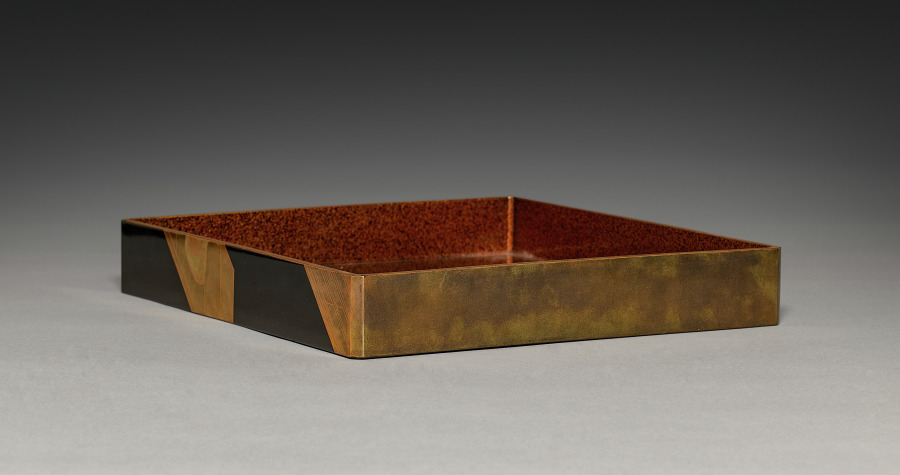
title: Writing Box with Spitting Courtesan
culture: Japan, Edo period (1615–1868)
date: early to mid-1800s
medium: Lacquered wood with maki-e (image made of sprinkled gold dust)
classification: Lacquer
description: The design on this writing box shows a courtesan who has just completed an impressive feat of spitting the term shinobukoi (忍恋), which could be translated as “hidden love” or “unrequited love,” on an earthen wall. The phrase appeared in classical Japanese poetry anthologies produced by nobles writing in ink on the finest decorated papers. Here, the confining walls of the brothel district become a space for public announcement in graffiti, with the medium being perhaps tea.